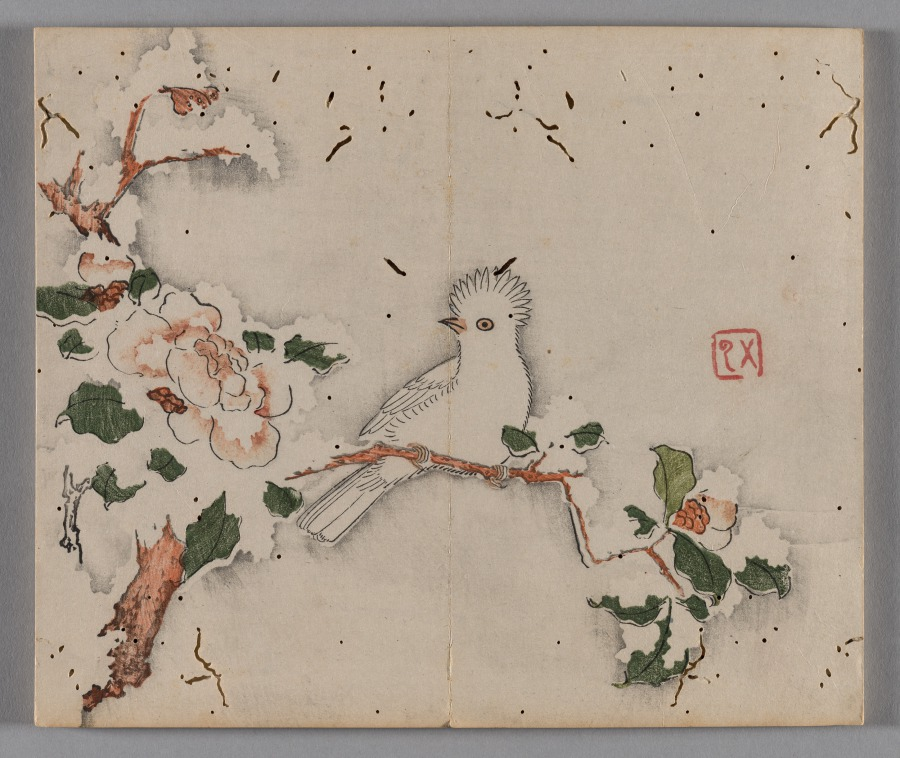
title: Ten Bamboo Studio Painting and Calligraphy Handbook (Shizhuzhai shuhua pu): Birds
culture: China, Qing dynasty (1644-1911)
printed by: Hu Zhengyan (Chinese, c. 1584–1674)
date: 1633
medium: Woodblock-printed book; ink and colors on paper; first edition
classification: Print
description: Color printing reached a level of perfection in the early 1600s, as seen in this Ten Bamboo Studio Collection of Calligraphy and Painting and the Mustard Seed Garden Manual of Painting (printed 1679 and 1701). The painterly quality, precision in registering (aligning) the woodblocks, and harmonious colors made them the most successful color print editions in Chinese history. Both editions were printed and compiled in Nanjing, spread nationwide, and had a great impact on the arts in Japan and Korea.